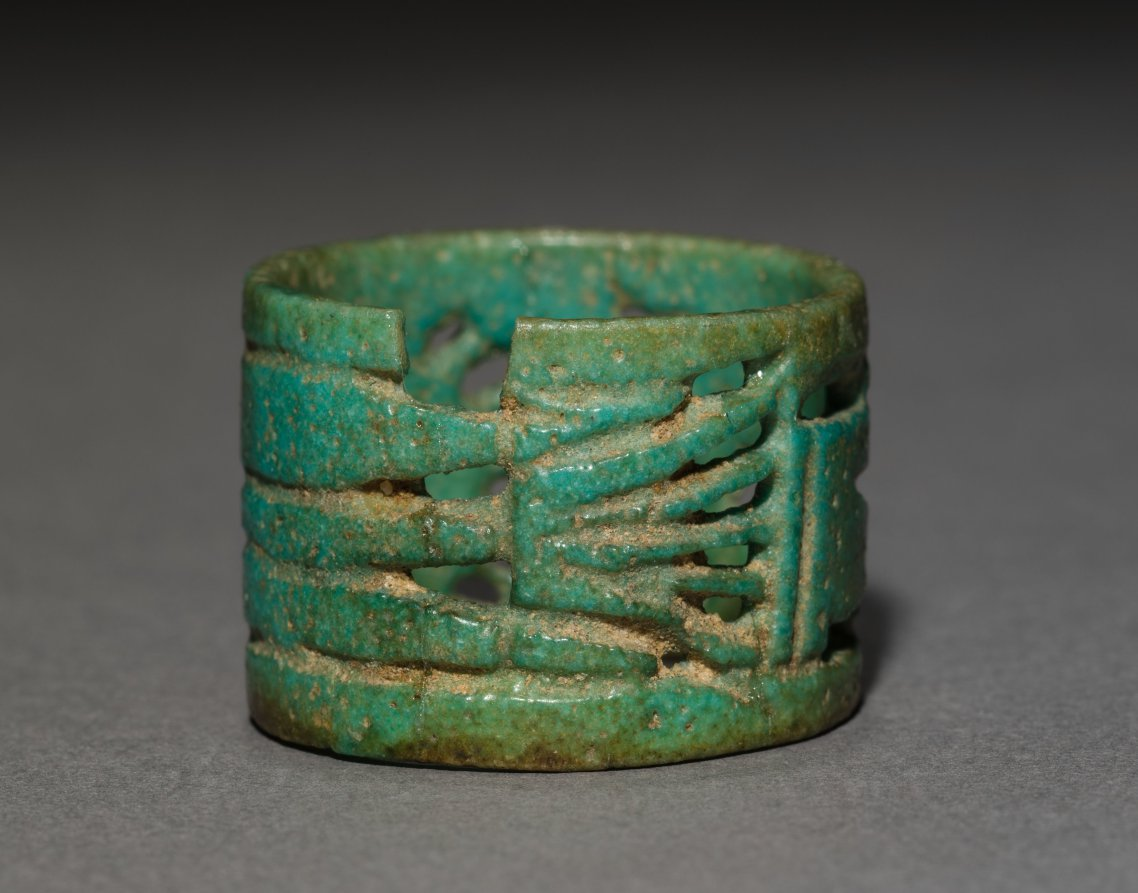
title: Openwork Ring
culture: Egypt, Third Intermediate (1069–715 BCE), Dynasties 21–22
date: 1069–715 BCE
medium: turquoise faience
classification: Jewelry